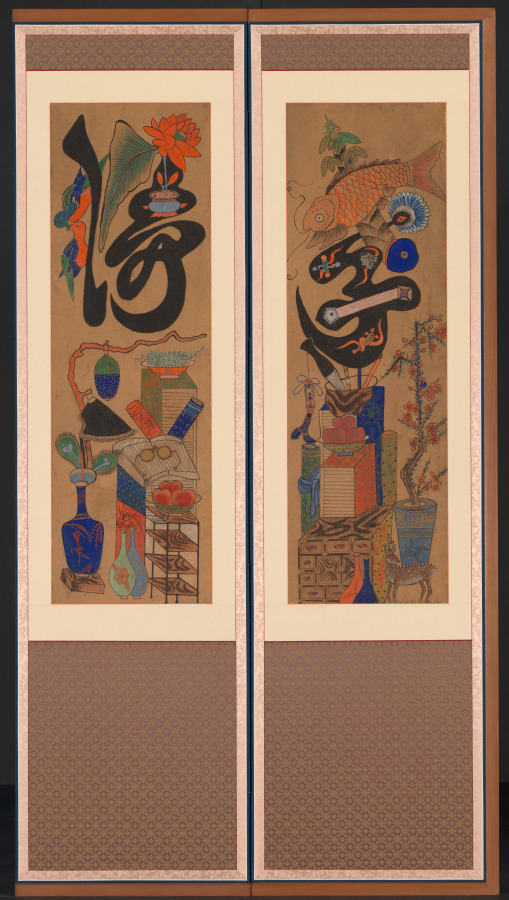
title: Munja-Chaekgeori Screen (Character-Books Screen)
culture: Korea, Joseon dynasty (1392–1910)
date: early 1900s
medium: Eight-panel folding screen, ink on paper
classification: Painting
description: This folding screen is a whimsical harmony of two different subjects: chaekgeori, or books and things; and munja, or characters. The lower section of each panel depicts the imagery of things, including books, decorative arts, and utilitarian objects. The upper portion of each panel bears a classical Chinese character. Read from far right to left, the eight characters refer to the values of Confucian teachings of the Joseon dynasty: filial piety, brotherly love, loyalty, trust, propriety, righteousness, modesty, and humility. While these two pictorial genres are harmoniously conjoined on the same picture plane, two sharply contrasting world views—urban consumerism and traditional Confucian ethics that despise materialism—compete with one another.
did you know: The eight Korean characters each mean filial piety, brotherly love, loyalty, trust, propriety, righteousness or justice, modesty or integrity, and humility or the feeling of shame.